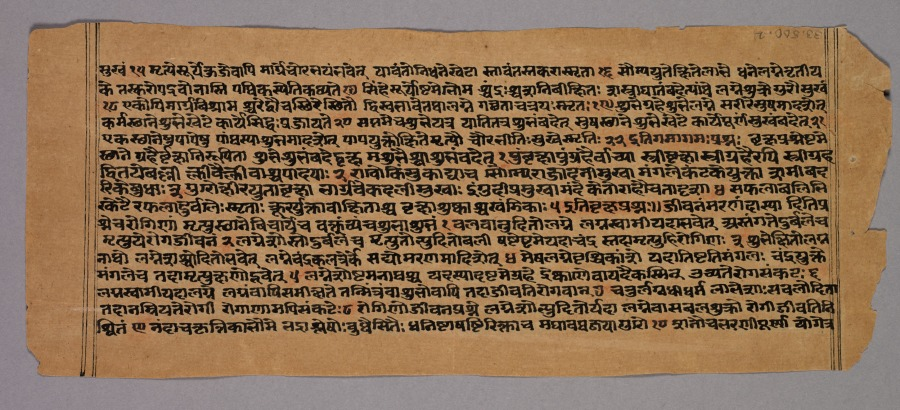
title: Page from the Prasnapradipa, a Hindu Astrology Text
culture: Western India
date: 1500s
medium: ink on paper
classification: Manuscript